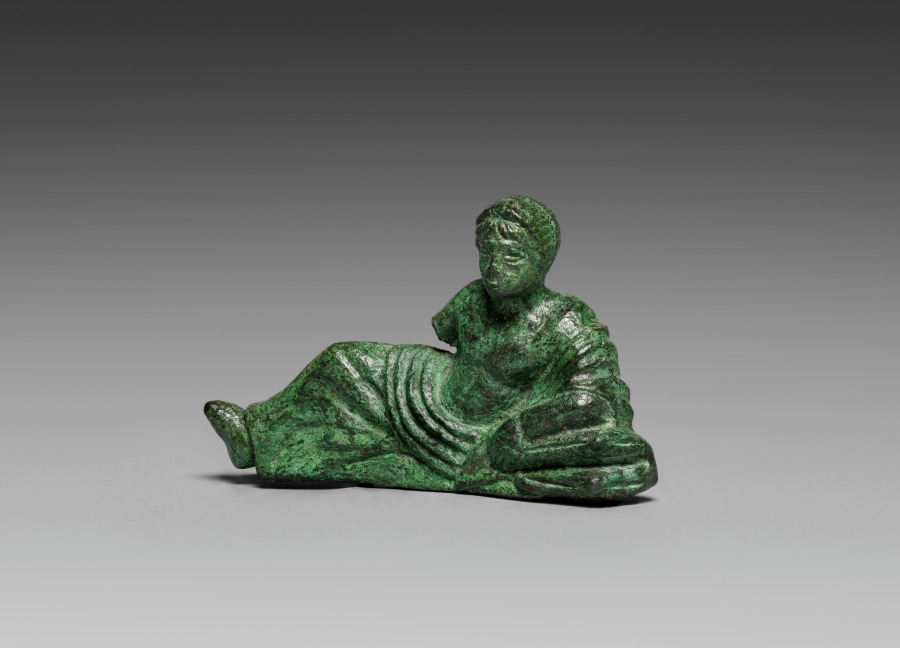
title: Vessel Ornament of Banqueter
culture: Etruscan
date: c. 400–375 BCE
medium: bronze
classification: Sculpture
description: This bronze banqueter figurine was one of six once adorning the rim of a large basin, now lost. Cast in molds with individualized details, most have grooves on their underside to attach to the basin. Minute traces of gilding remain on areas of clothing and skin (mostly visible only under magnification), suggesting that they may have been completely gilded. Two handles in the form of hippocampi, horses with serpentine tails, also belonged to the basin and are now displayed at the Michael C. Carlos Museum at Emory University. The basin may have been used to hold liquid for a banquet, or was perhaps funerary. This bronze figurine lies on his side in the posture of an ancient banqueter. His right arm is broken off but may once have rested on his hip. The figurine wears a garland on his head and a himation draped loosely around his left shoulder, revealing a muscular chest. One leg is raised over the other and a foot is exposed. Specks of gilding remain on the chest and head, but is different in color than that on the other five figurines. Also unlike the others, this one bears a visible seam across its entire length and has no groove underneath.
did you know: This reclining male banqueter demonstrates the posture of symposium guests.